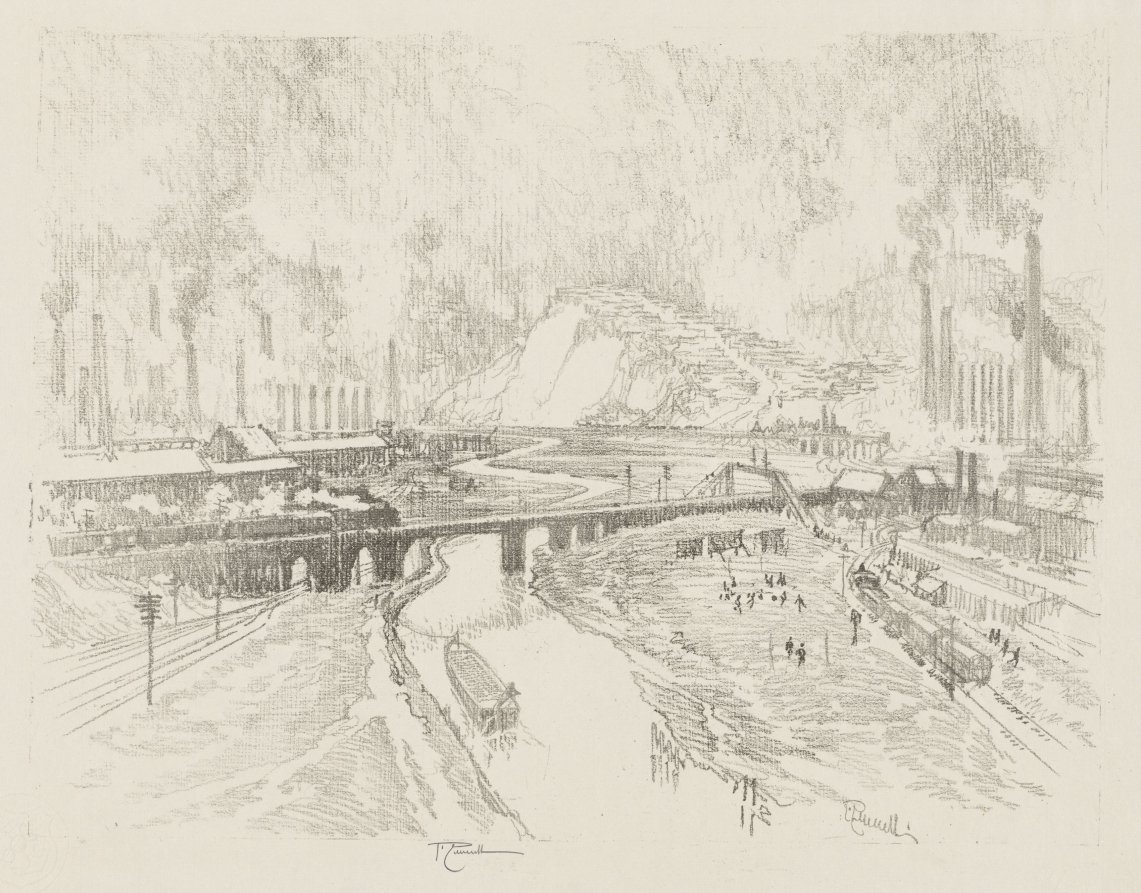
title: English War Work: Munition Town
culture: America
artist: Joseph Pennell (American, 1857–1926)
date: 1916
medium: lithograph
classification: Print